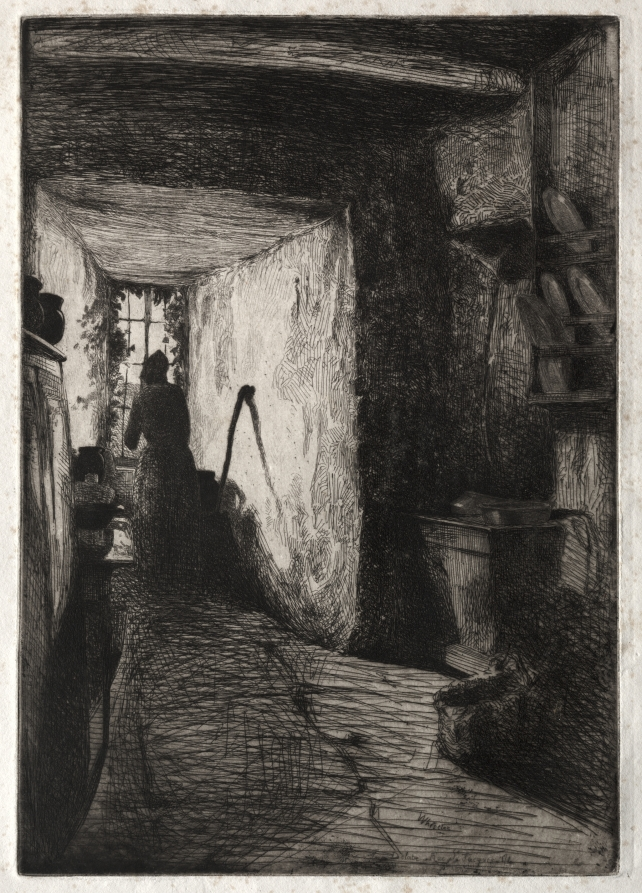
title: The Kitchen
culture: America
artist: James McNeill Whistler (American, 1834–1903)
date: 1858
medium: etching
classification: Print